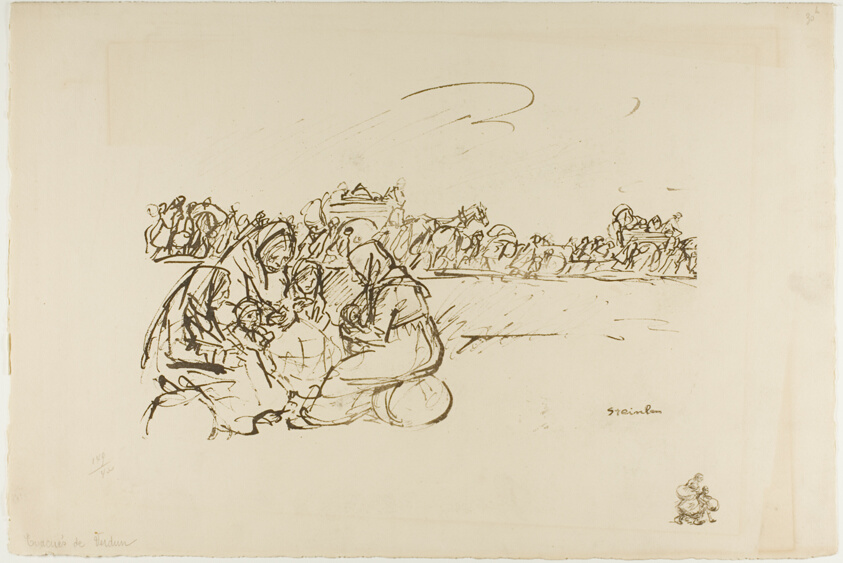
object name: Print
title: Evacuees from Verdun, plate thirty from Actualités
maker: Théophile-Alexandre Steinlen; French, born Switzerland, 1859-1923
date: published May 1916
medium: Lithograph in dark brown on cream wove paper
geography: France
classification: lithograph; print; prints and drawing